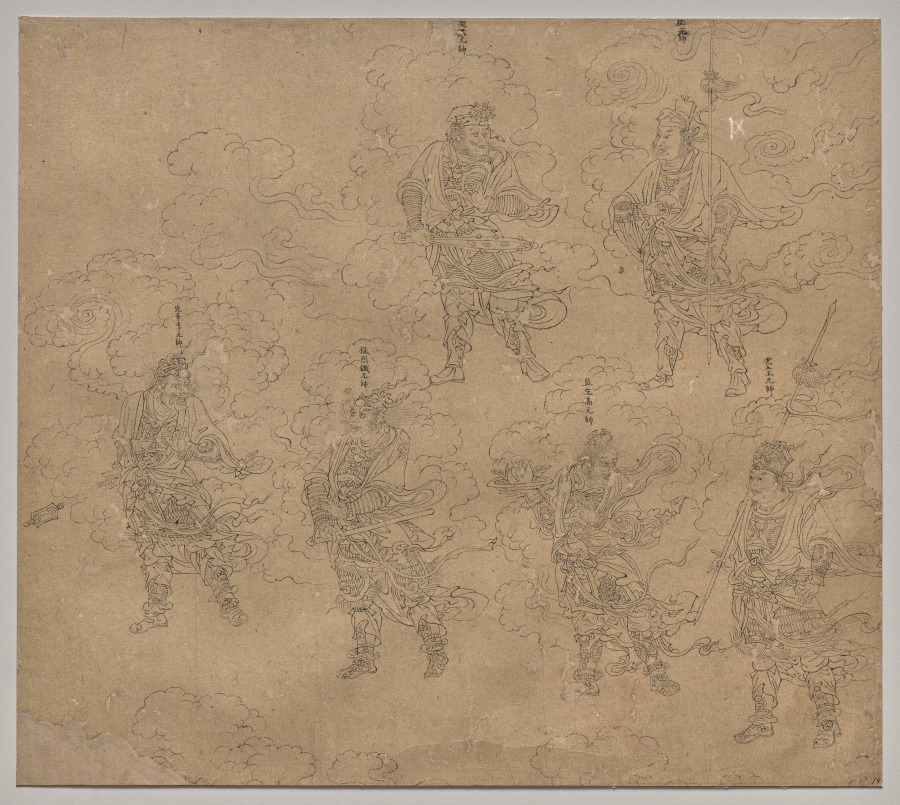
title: Album of Daoist and Buddhist Themes: Procession of Daoist Deities: Leaf 14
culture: China, Southern Song dynasty (1127-1279)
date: 1200s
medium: Album, ink on paper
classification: Painting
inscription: 虎丘王元帥; □□元帥; 監生高元帥; □溫元帥; 猛烈鐵元帥; 先鋒李元帥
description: These six martial figures are Field Marshals in the Daoist pantheon. In the lower row from left to right are Field Marshals Li Feng 李封, Tie Tou 鐵頭, Gao Tong 高銅, and Wang Tie 王鐵. Field Marshal Wen Xiong 溫瓊 is on the top left. The inscription identifying the final field marshal has been trimmed off, so his identity is unclear.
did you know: A baby is nestled in a blossom on the tray that Field Marshal Gao is holding.